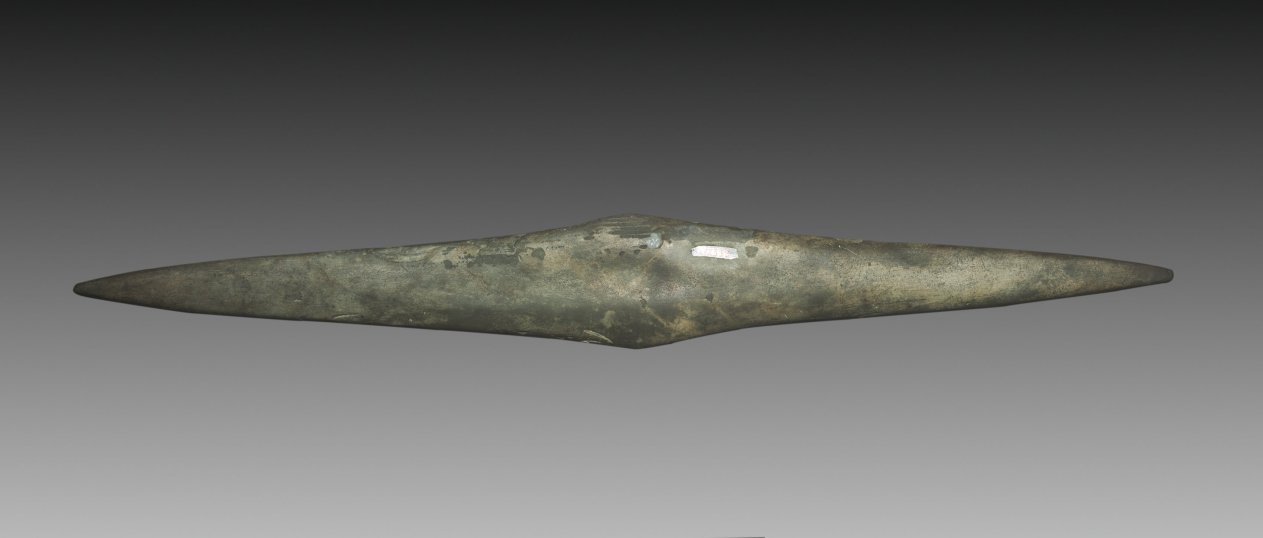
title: Rhomboidal Palette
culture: Egypt, Predynastic (5000–2950 BCE), Naqada I (3900–3500 BCE)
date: 4000–3500 BCE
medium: graywacke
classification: Implements